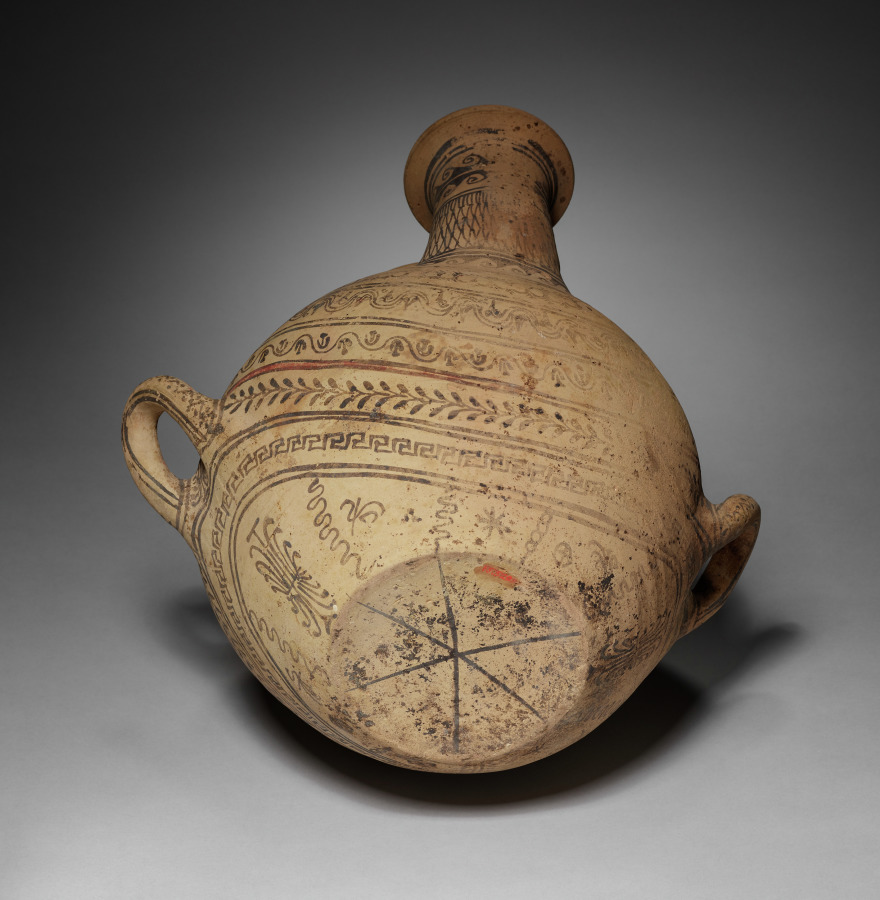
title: Two-Spouted Strainer Askos (Flask)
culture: South Italian, Daunian or Canosan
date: 300–200 BCE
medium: ceramic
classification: Ceramic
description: Although now referred to by the Greek term askos, because of its resemblance to the animal skins used to hold wine in ancient Greece, this ceramic shape developed in the South Italian region of Daunia (north of Apulia, on the Adriatic coast). This example is unusual for its three openings—one covered by a lid, the others spouted with built-in strainers. Its profusely painted decoration, mostly geometric and vegetal patterns applied in black with added red and white, is arranged in bands that follow the contours of the vessel.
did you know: Each spout has a built-in strainer—one near the top, the other near the bottom.